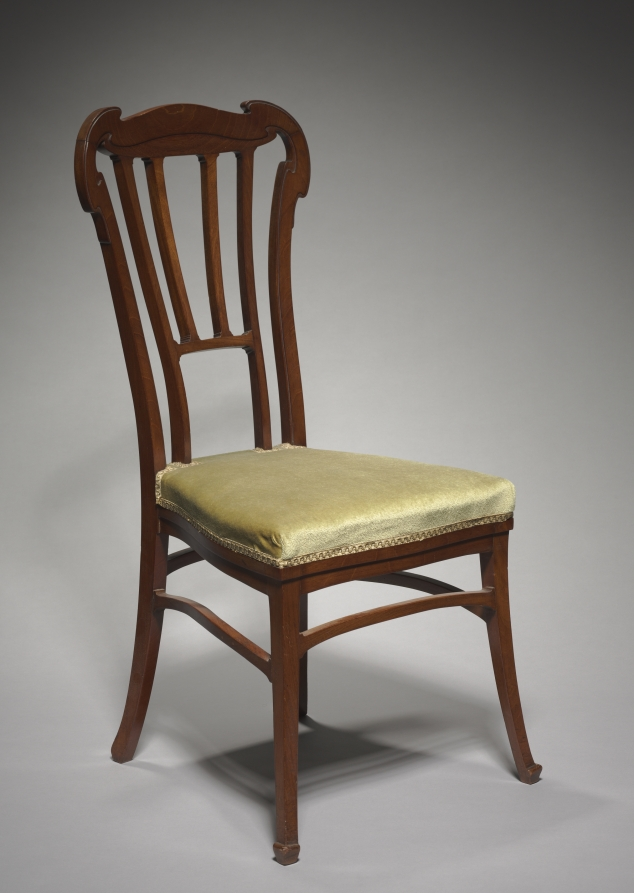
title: Chair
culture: Belgium, 20th century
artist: Victor Horta (Belgian, 1861–1947)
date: c. 1900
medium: mahogany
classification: Furniture and woodwork